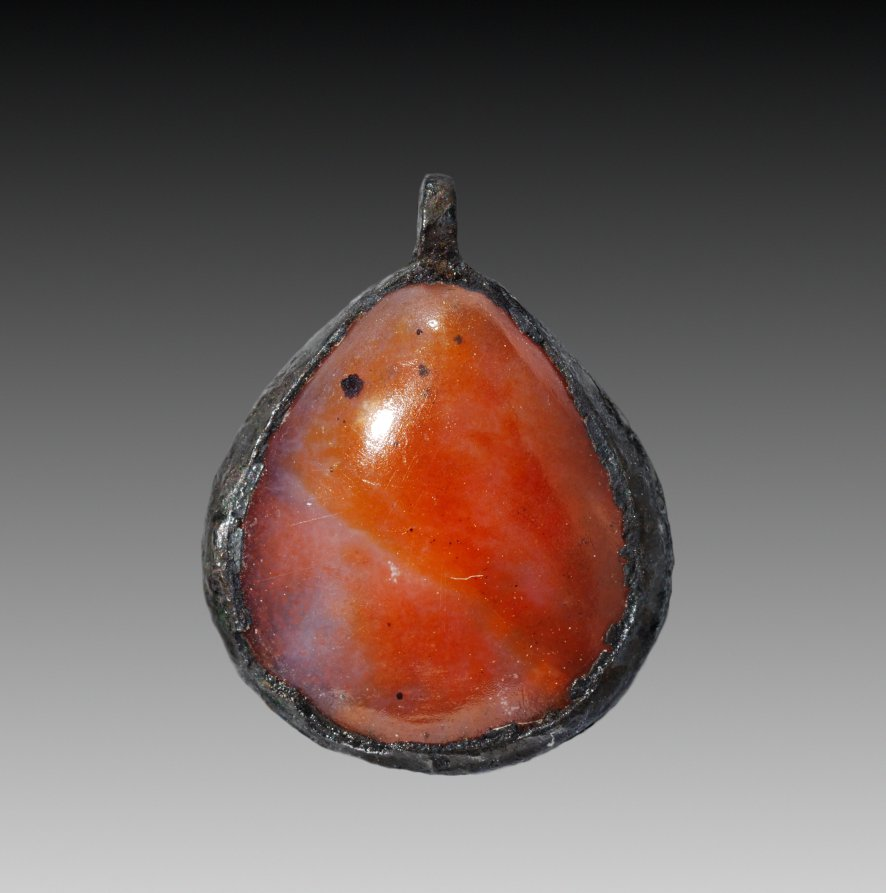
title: Oyster-Shell Pendant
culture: Egypt, Middle Kingdom (2040–1648 BCE), Dynasty 12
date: 1980–1801 BCE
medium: carnelian and silver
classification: Jewelry